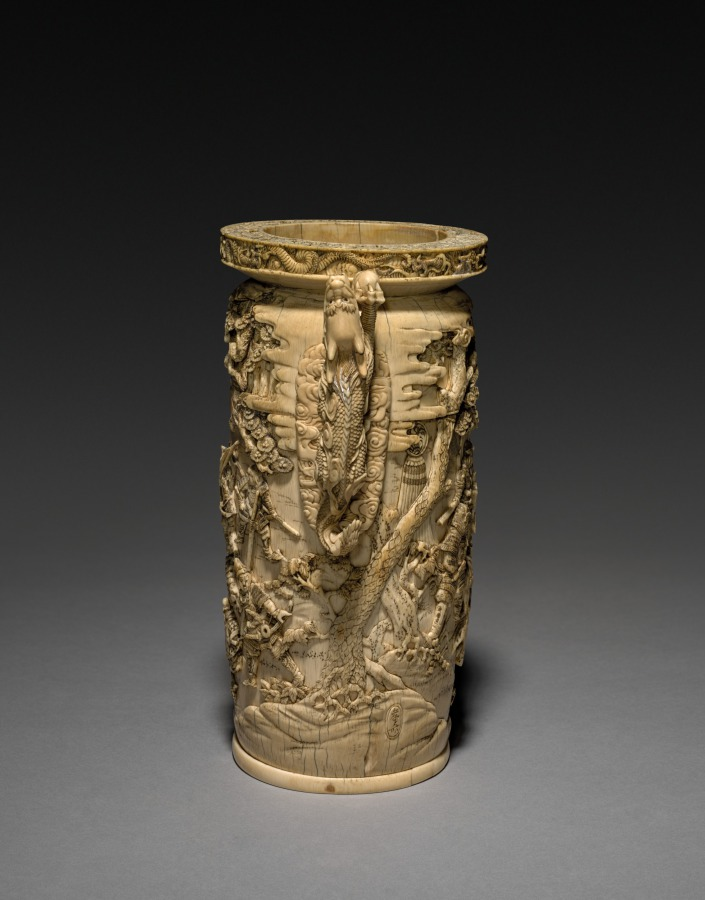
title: Carved Vase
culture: Japan, Edo period (1615–1868) to Meiji period (1868–1912)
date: 1800s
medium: ivory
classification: Ivory